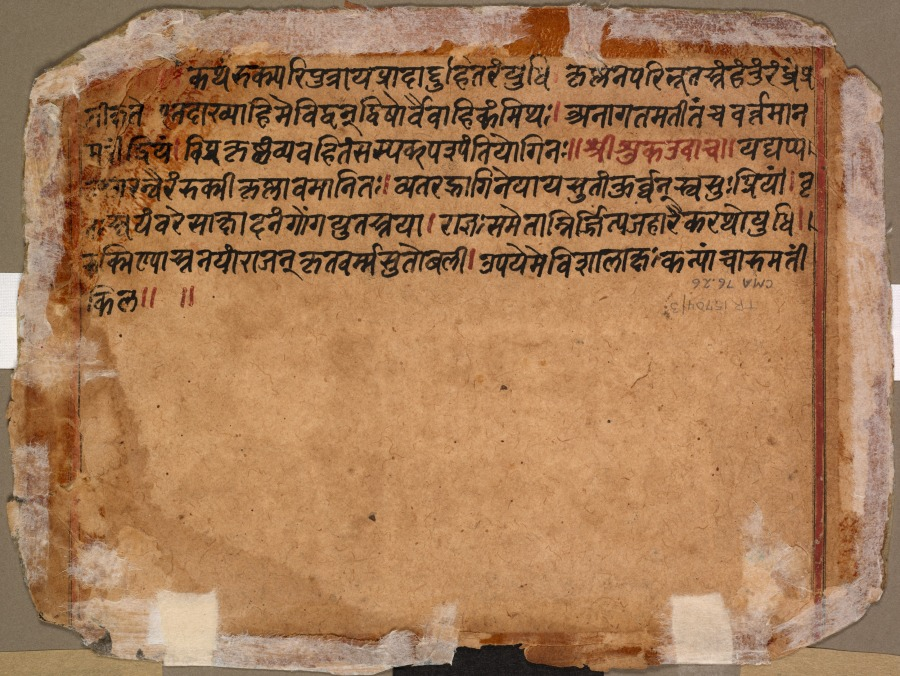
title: The Marriage of Pradyumna and Rukmavati, page from a Bhagavata Purana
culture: Northern India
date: c. 1525–40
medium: Gum tempera and ink on paper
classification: Painting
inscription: [[recto, lower margin, beside illegible smaller script]] pradyumna ko vivahu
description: Like his father Krishna, Pradyumna appears blue in color. He is shown three times in this painting with his bride. The scene of his marriage is in the upper level where a Brahmin, a Hindu priest, to the right of the pole and wearing a white lower garment and looped topknot of hair, performs the ceremony. Their arrival at the ceremony is pictured below. The flattened spaces and bold variety of background colors are typical of a major strain of Indian paintings made before the time of the Mughal emperor Akbar, who encouraged stylistic changes derived from exposure to Persian and European art forms.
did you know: Pradyumna was the son of Krishna and an incarnation of the god of love.